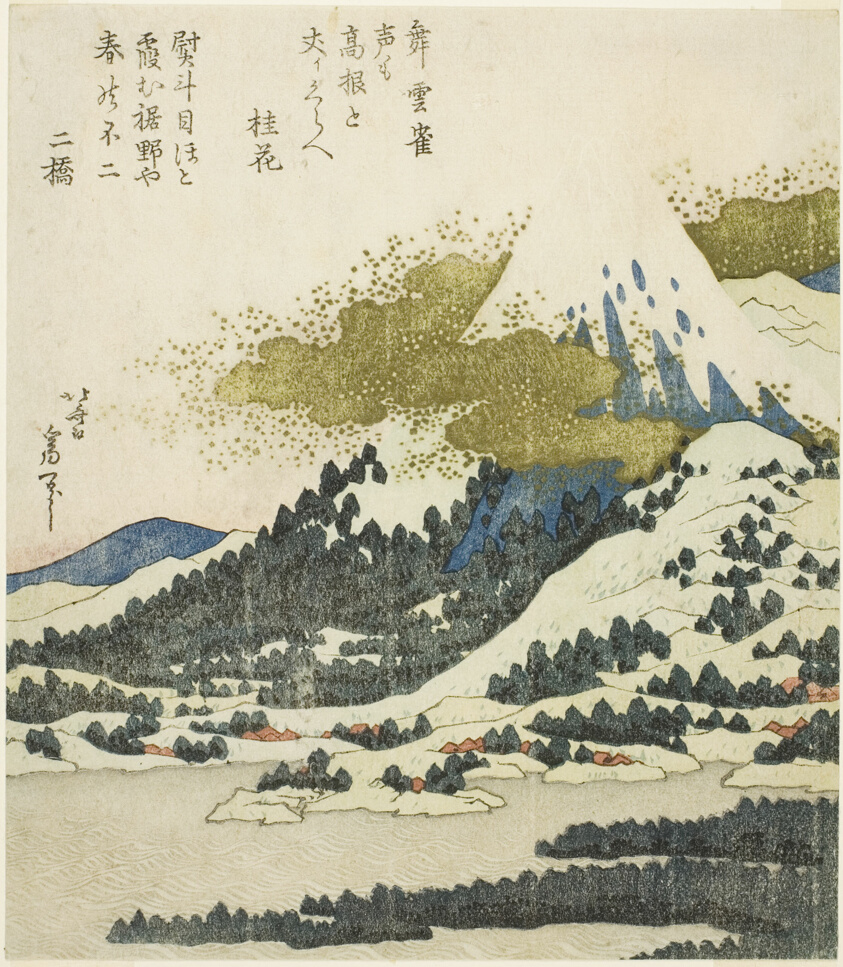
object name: Print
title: Mount Fuji from Lake Ashi in Hakone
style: Japanese (culture or style)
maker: Katsushika Hokusai 葛飾 北斎; Japanese, 1760-1849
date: c. 1830/35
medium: Color woodblock print with metallic pigments; shikishiban, surimono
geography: Japan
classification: woodblock print; print; asian art